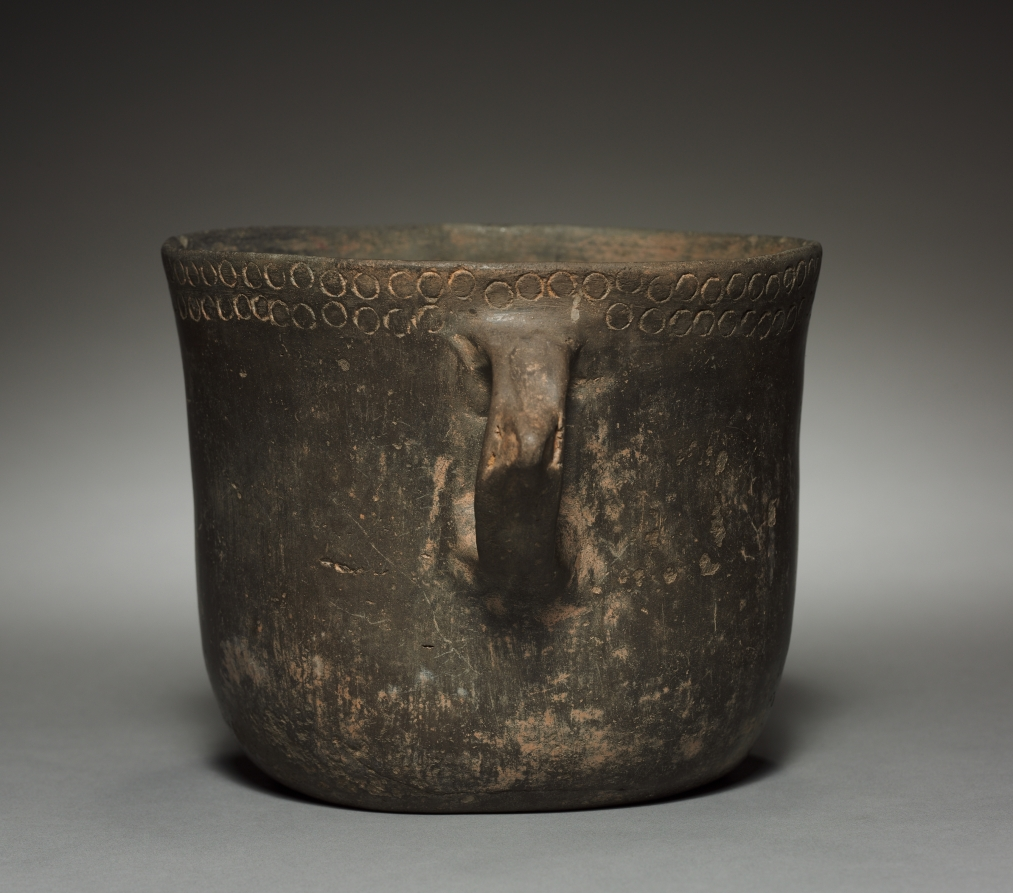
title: Drinking Vessel with Handle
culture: Argentina, Cienga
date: c. 600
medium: earthenware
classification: Ceramic